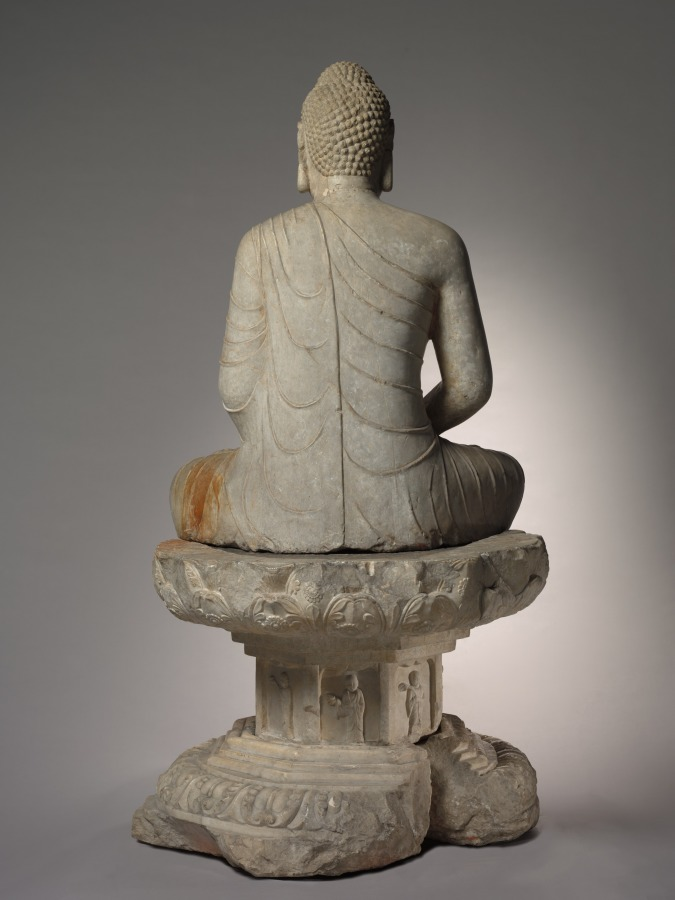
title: Fang Xuanling Pedestal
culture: China, Tang dynasty (618-907)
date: 647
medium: marble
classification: Sculpture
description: This double lotus pedestal exhibits the rich, ornate style of early Tang sculpture. It was commissioned by the Duke of Liang, Fang Xuanling (578–648), for the blessing of his second son and daughter-in-law, the Tang imperial princess of Gaoyang. The iconography and inscription suggest that it originally went with a statue, now missing, of Shakyamuni, the historical Buddha, instead of Amitayus. Today the pedestal is topped with Amitayus, the Buddha of Infinite Life, seated in meditation. Although the pedestal was not made with the statue, the combination is faithful to the original artistic conception.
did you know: In front, the top layer of the pedestal has an abstract curvilinear motif suggesting drapery; the rear is carved with a flower-and-leaf motif.